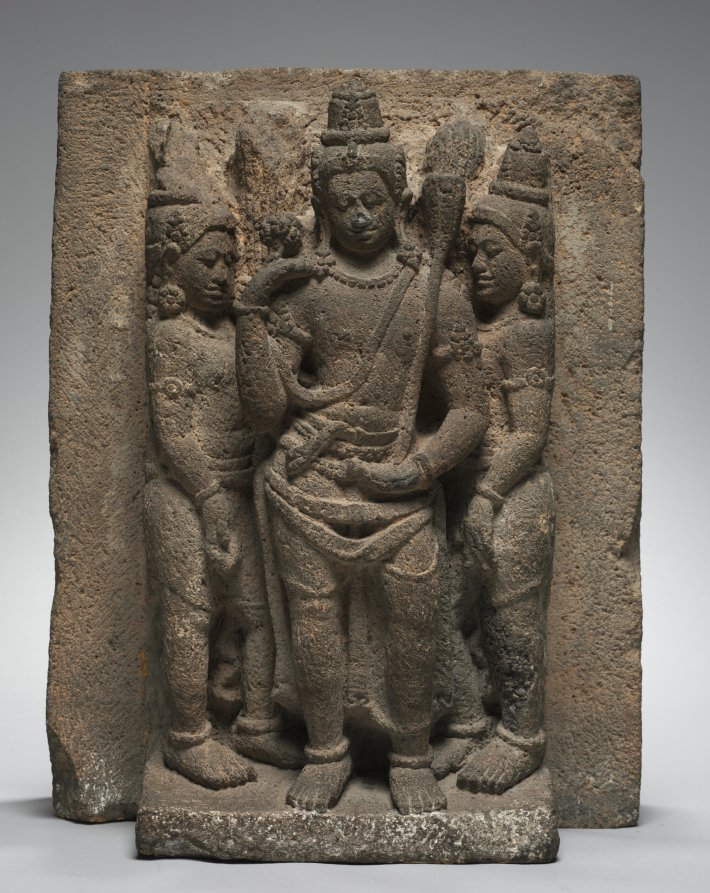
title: Triad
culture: Indonesia, Central Java, Prambanam, Temple of Loro Jonggrang, early 10th Century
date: early 900s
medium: volcanic stone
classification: Sculpture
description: This group has been linked to a temple dedicated to Shiva in Central Java. Its name, Loro Jonggrang, meaning "Slender Maiden," refers to the image of the warrior goddess Durga on the temple, which local legend links to the form of a princess cursed to be turned into stone. The highly porous stone is the distinctive material used to construct temples on the volcanic islands of Indonesia.